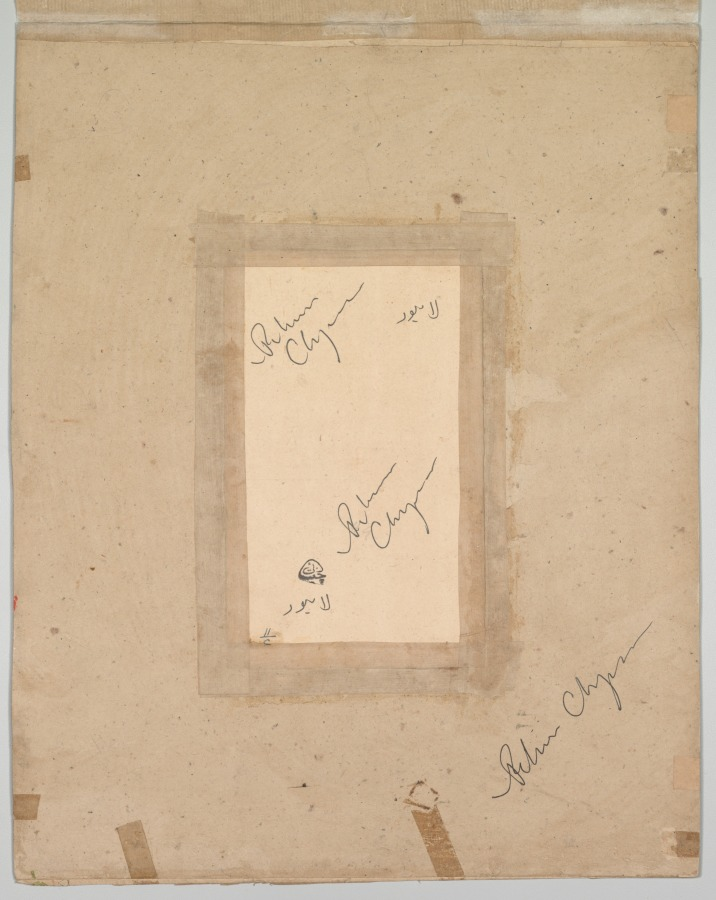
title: Portrait of Raja Jagat Singh of Nurpur (reigned 1618–46)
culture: Mughal India, Court of Jahangir (reigned 1605 - 27), possibly Lahore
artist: attributed to Bichitr (Indian, active c. 1615–50)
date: probably 1619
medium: Gum tempera and gold on paper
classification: Painting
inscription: ascription in lower right corner: amal - i bandieh dargah Bichitr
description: Jagat Singh was a prince from a small kingdom in the western Himalayan foothills who grew up at the imperial Mughal court of Jahangir and his queen Nur Jahan. He was given the title of prince in 1619, and this painting may commemorate that event. Very few nobles from the hill states had positions at the Mughal court at this time, so his portrait is a rare imperial Mughal painting. The emperor and his favorite wife frequently visited Nurpur, named “City of Light” in their honor, to hunt and relax, and Prince Jagat Singh was a favorite of the queen. She interceded on his behalf in 1624, when he joined a rebellion to dethrone her husband.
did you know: Jagat Singh, shown in this miniature, was a favorite of the Mughal queen.